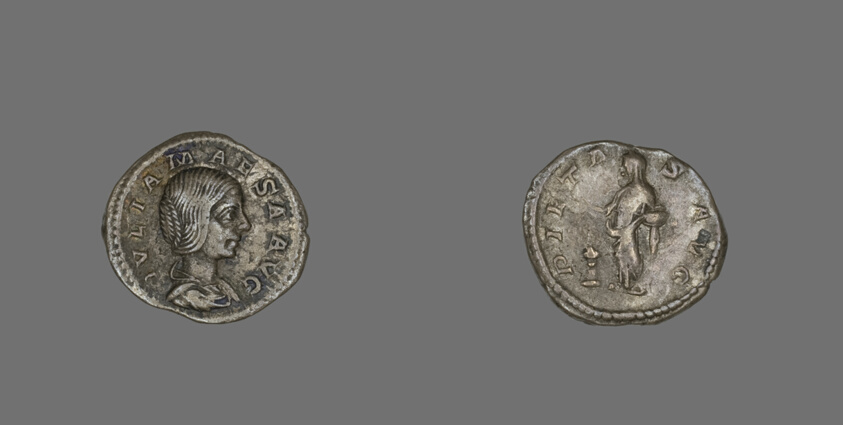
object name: Coin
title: Denarius (Coin) Portraying Empress Julia Maesa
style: roman (ancient, style or period), ancient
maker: Roman, minted in Antioch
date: 218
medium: Silver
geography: Roman Empire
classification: coin; ancient art